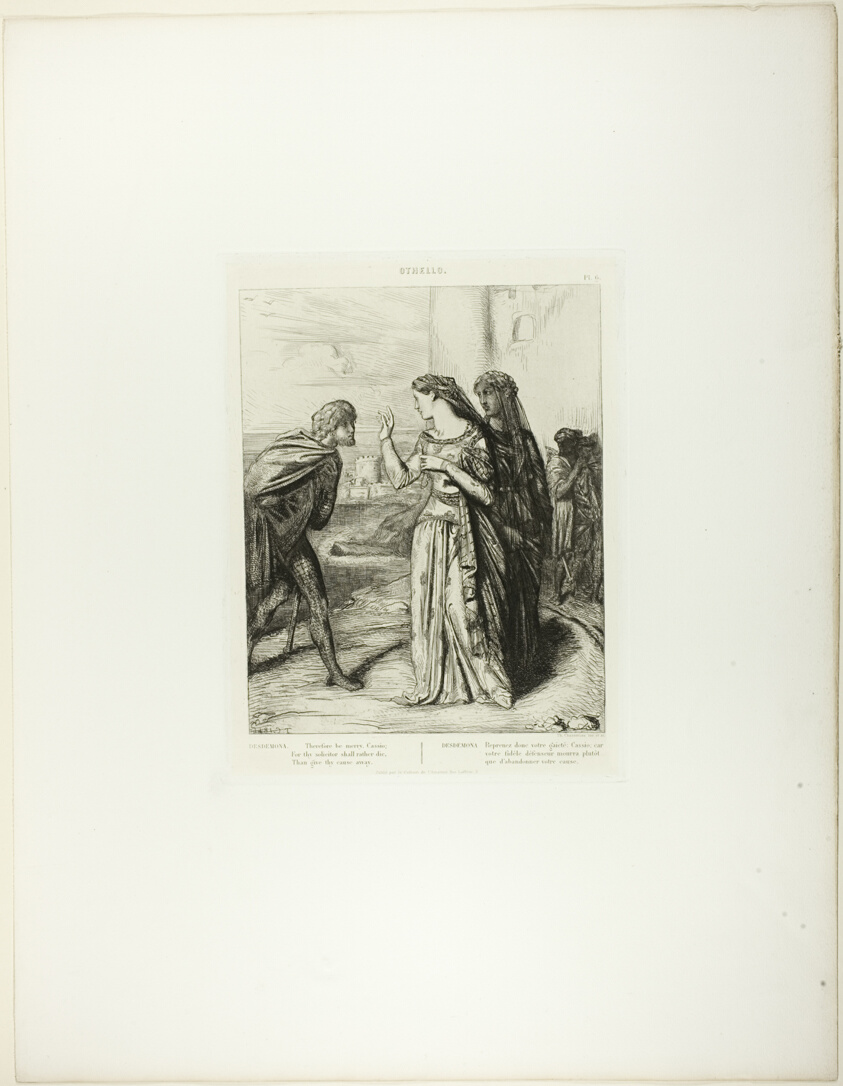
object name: Print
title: Therefore be Merry Cassio, plate 6 (act 3, scene 3) from Othello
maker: Théodore Chassériau (French, 1819-1856)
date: 1844, printed 1900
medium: Etching, engraving, roulette and drypoint on ivory chine, laid down on white wove paper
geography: France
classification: etching; print; prints and drawing